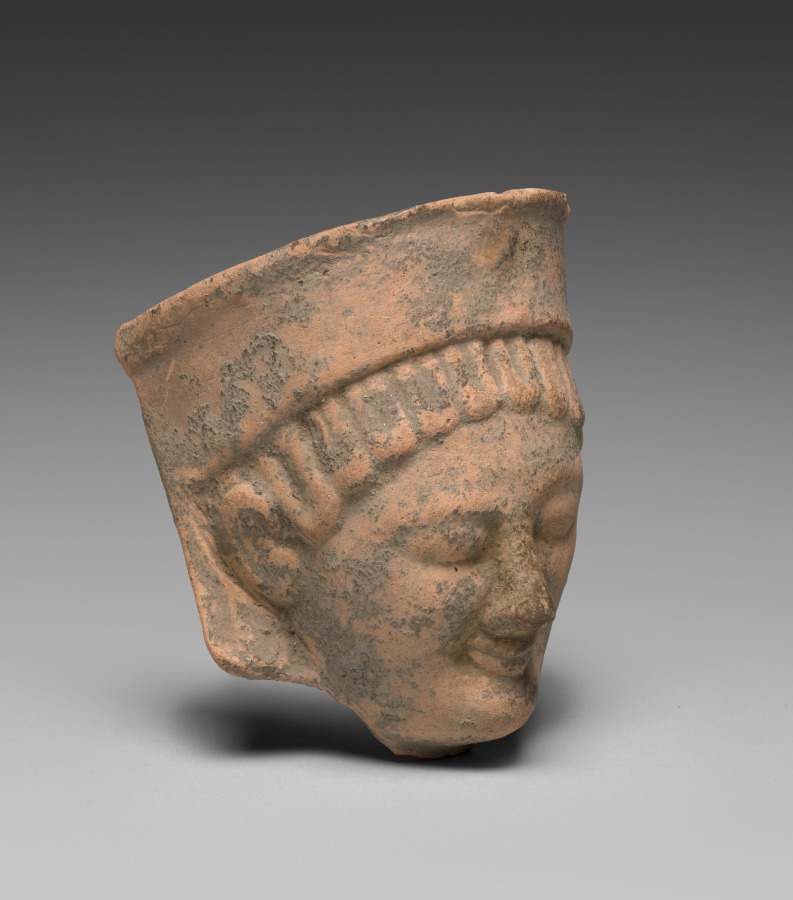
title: Mask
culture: Greece, Sicily, Selinus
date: 550 BCE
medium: terracotta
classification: Sculpture